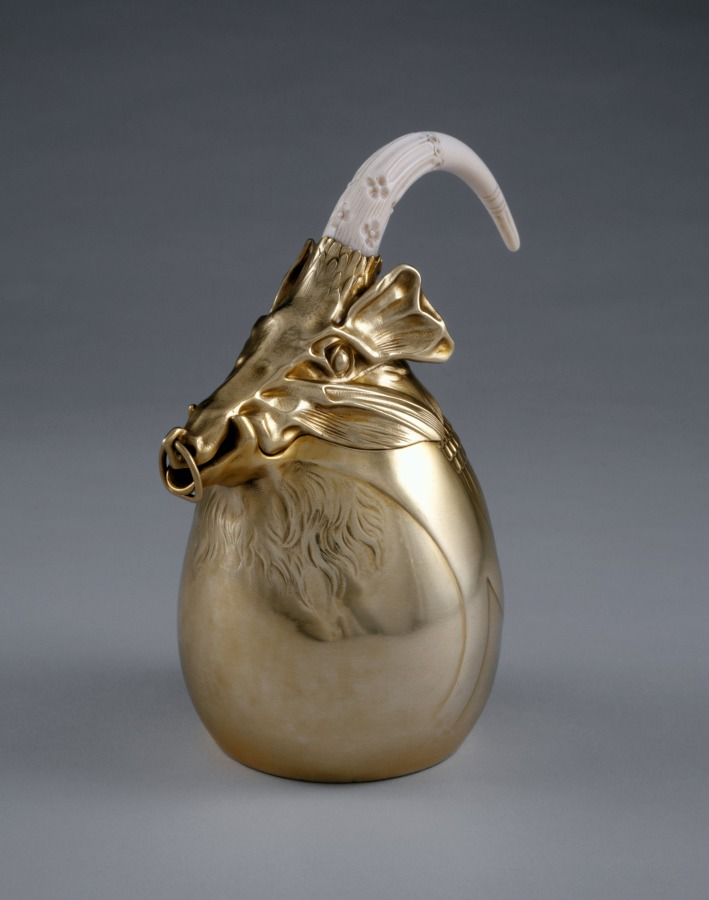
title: Tea Pot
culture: France, Paris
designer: Carlo Bugatti (Italian, 1856–1940)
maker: Adrien-Aurélien Hebrard (French, 1866–1937)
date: c. 1907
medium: Gilt silver and ivory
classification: Silver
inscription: Made by A. A. Hebrard Firm, Paris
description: This tea and coffee service, salver, and table, together with some now missing cups, were all designed by Carlo Bugatti as an ensemble and presented at the 1902 exposition devoted to decorative arts in Turin, Italy. The set was probably acquired from Bugatti's 1907 exhibition at the Galerie Hébrard in Paris by a wealthy South African widow, Anna Blake, who was living there at the time. Some of the animal and insect motifs suggest mythical beasts or the fossils of prehistoric animals. When Mrs. Blake returned to Cape Town, she took these and other pieces designed by Bugatti with her, and they remained in South Africa throughout her lifetime.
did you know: This tea pot is part of a tea and coffee service designed by Carlo Bugatti.